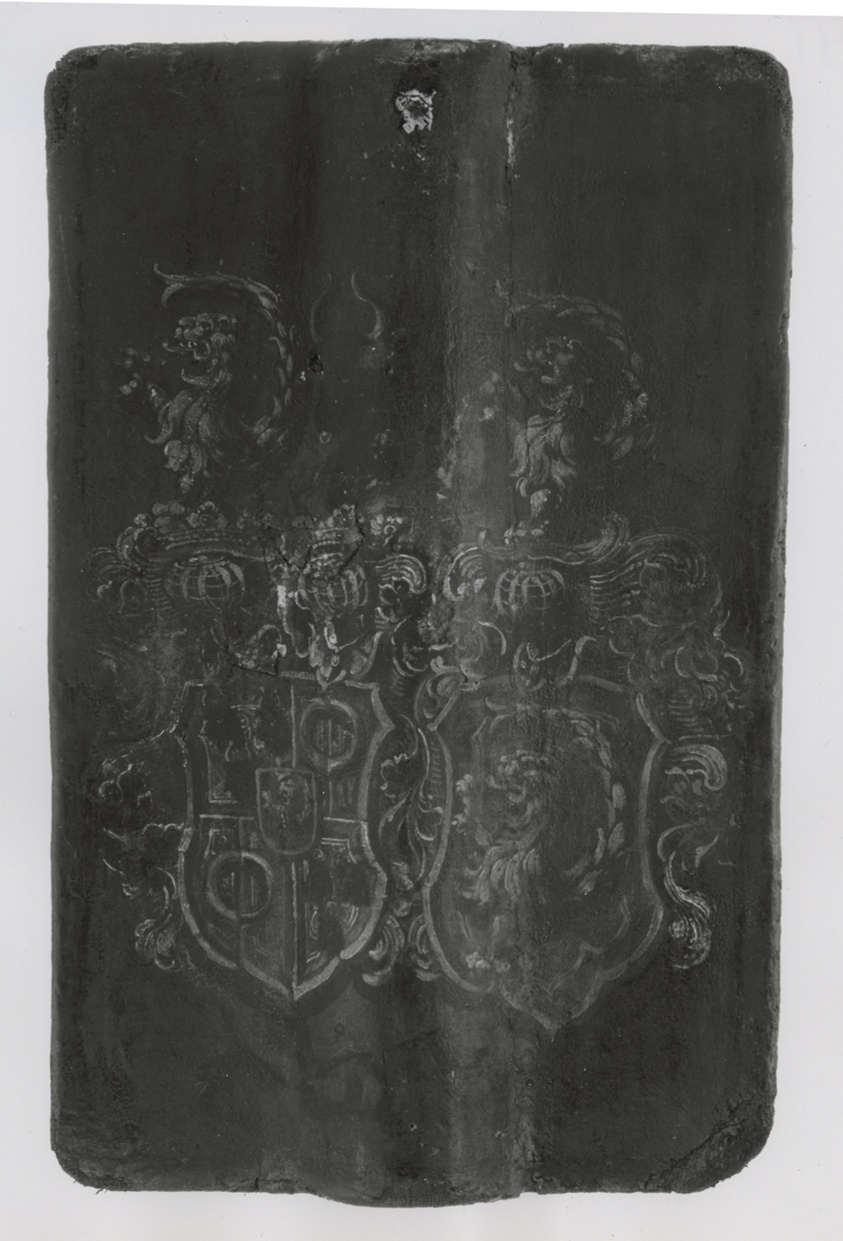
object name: Armor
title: Hand Pavise for Foot Combat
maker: German, Nuremberg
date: 1470/1500, painted late 18th century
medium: Wood, canvas, iron, and paint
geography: Nuremberg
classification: shield; armor; arms and armor